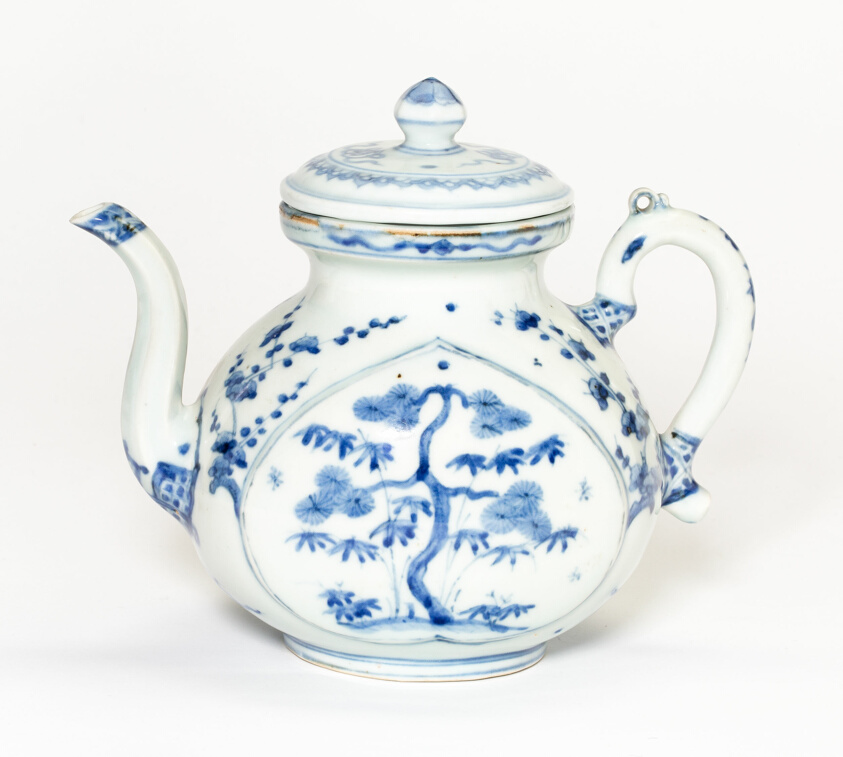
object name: Vessel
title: Ewer with Pine Trees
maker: China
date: Ming dynasty (1368–1644), Xuande reign mark and period (1426–1435)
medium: Porcelain painted in underglaze blue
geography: China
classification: porcelain; asian art; ceramics; vessel